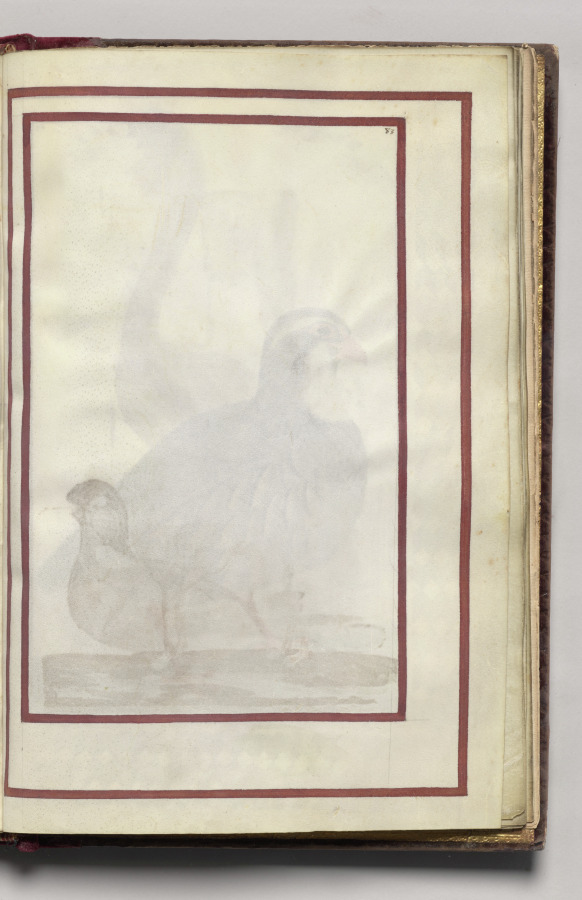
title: Border, folio 40 (recto), from Florilegium (A Book of Flower Studies)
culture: France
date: 1608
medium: watercolor, ink, silver and gold over occasional traces of pencil, on vellum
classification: Bound Volume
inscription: Dated: Poitiers 1608 (on frontispiece) Signed: On frontispiece in black ink, lower right: Van Kuyk Notation on drawing: Frontispiece: in pencil, lower margin: * élève de Van Kessel, peintre flammand (* in pencil also appears in front of Van Kuyk's name).